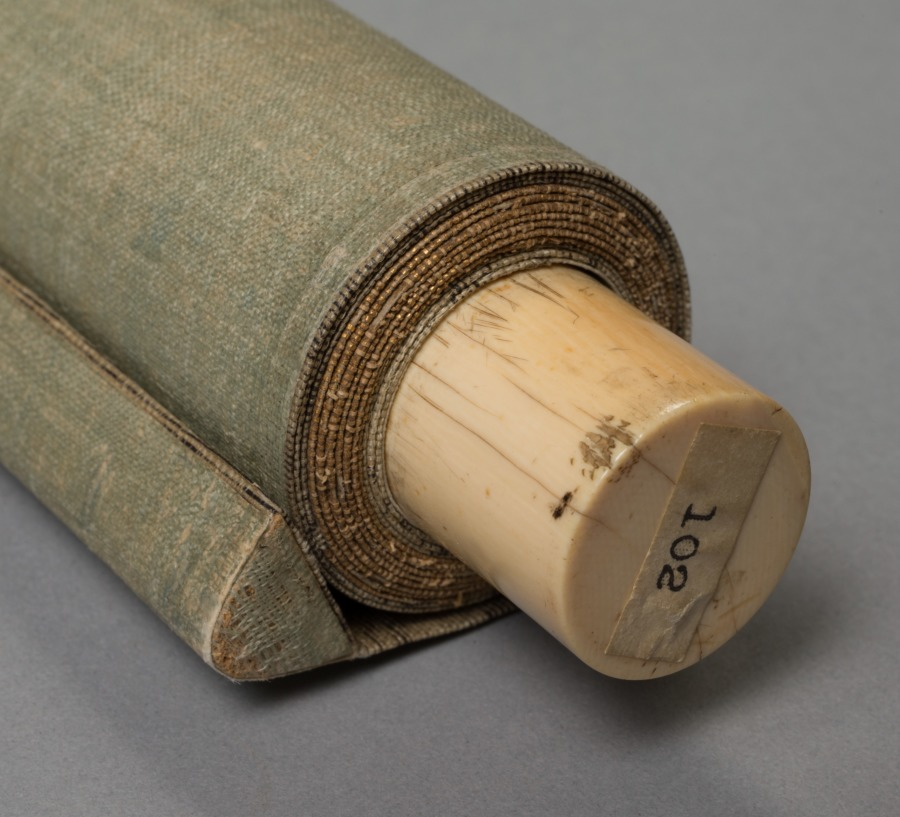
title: Wild Geese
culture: Japan, Muromachi period (1392–1573)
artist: Chōkichi (Japanese)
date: early 1500s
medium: hanging scroll; ink on paper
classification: Painting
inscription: Gourd-shaped seal of Chokichi at lower left